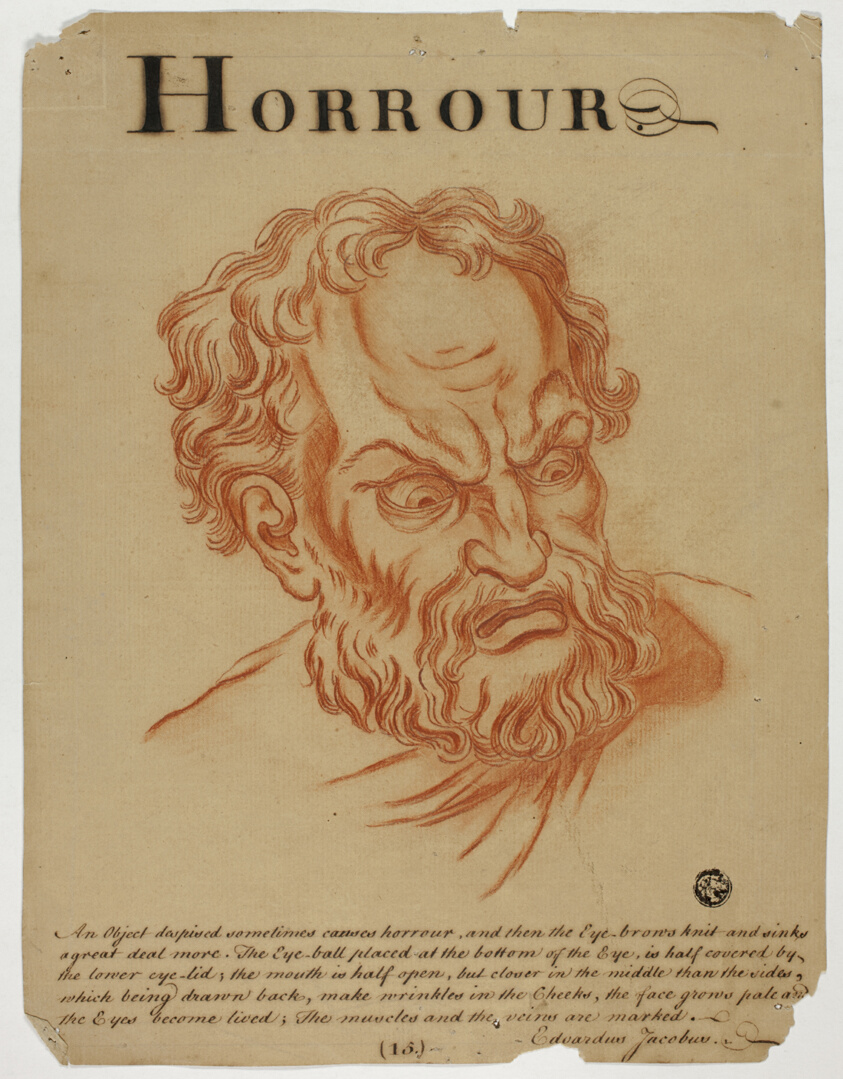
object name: Drawing and Watercolor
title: Horrour (sic)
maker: Eduardus Jacobus (British, 18th century); after Charles Le Brun (French, 1619-1690)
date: after 1698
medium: Red chalk, with touches of graphite, on tan laid paper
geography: United Kingdom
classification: chalk; drawings (visual works); prints and drawing